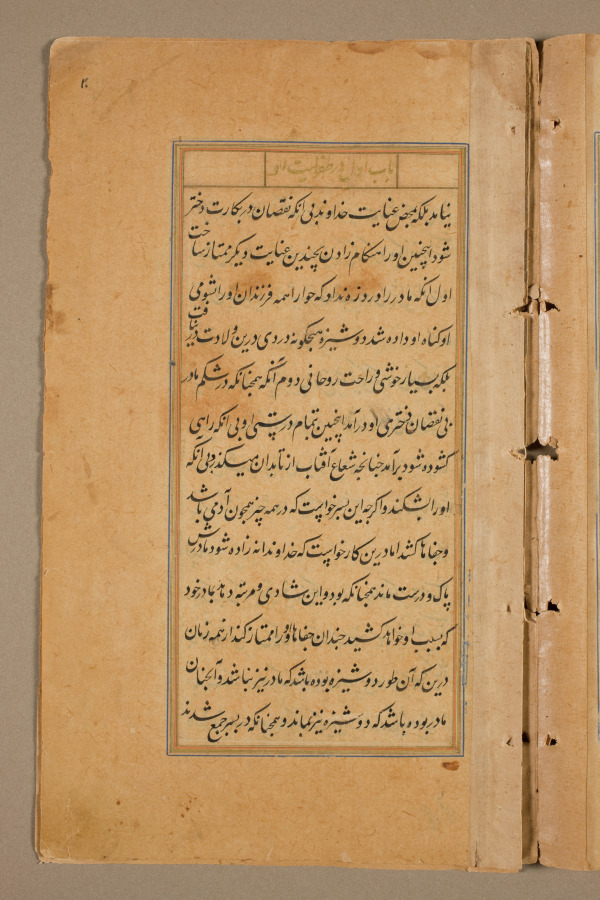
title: Text page from a Mirror of Holiness (Mir’at al-quds) of Father Jerome Xavier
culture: Mughal India, Allahabad, made for Prince Salim (1569–1627)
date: 1602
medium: Ink and gold on paper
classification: Manuscript